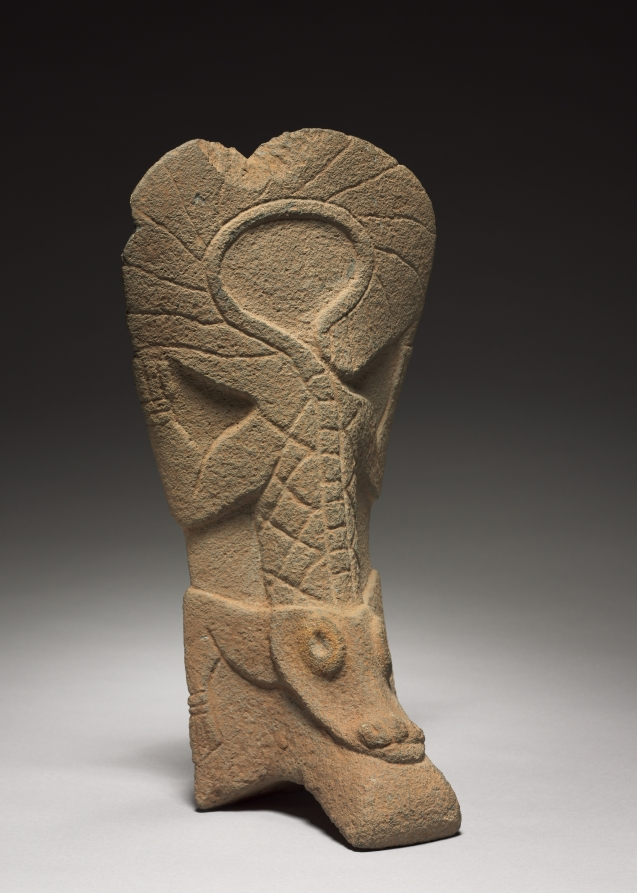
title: Ballgame Palma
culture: Mexico, Gulf Coast, Classic Veracruz style (600-1100)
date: 900–1100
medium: stone, pigment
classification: Sculpture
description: Stone palmas, so-called today for their palm-frond-like shape, are ceremonial sculptures that may replicate lightweight gear worn over the chest during the ballgame. Palma imagery is not well-studied and the meaning of the caiman (New World alligator) carved on both sides of this example is unknown. The tail is beautifully adapted to the palma's curved upper edge.